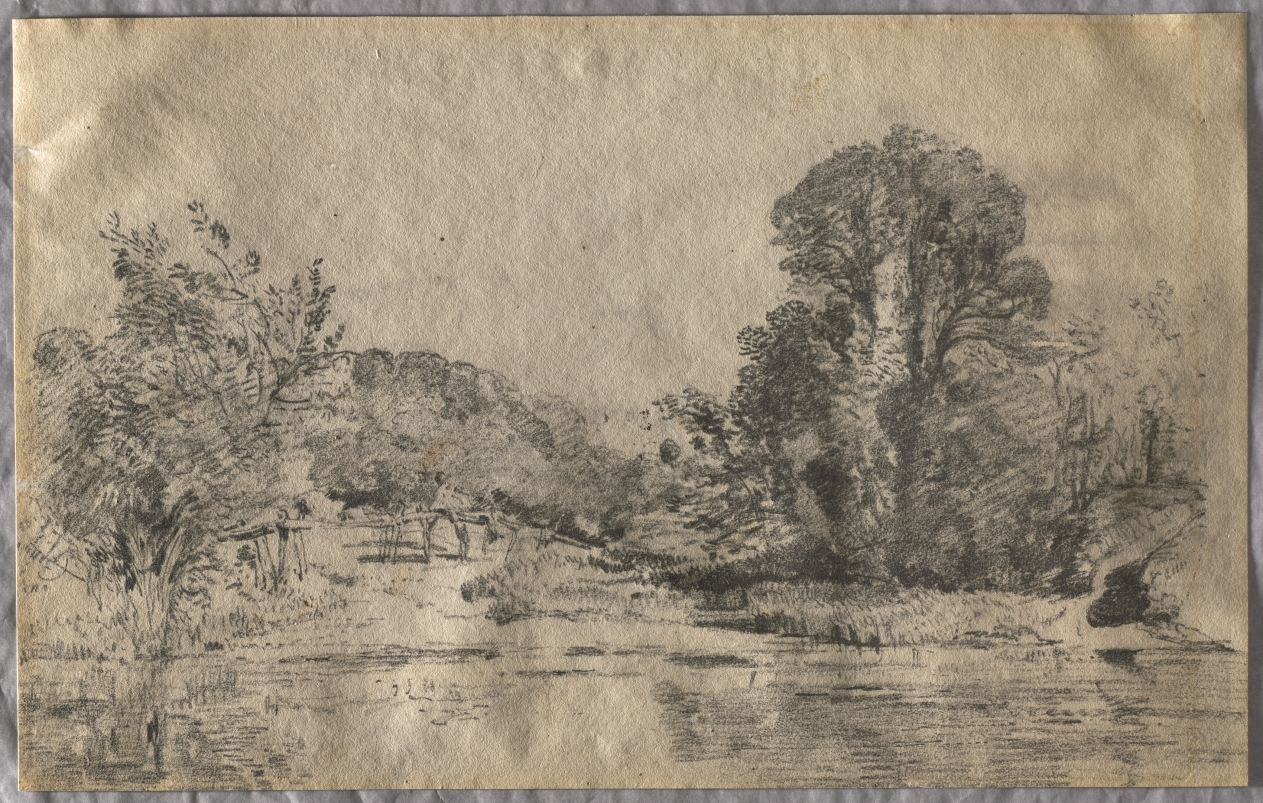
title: Landscape with Trees Surrounding a Pond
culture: England, 19th century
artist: John Constable (British, 1776–1837)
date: c. 1800–37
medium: graphite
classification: Drawing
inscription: Watermark: 1811